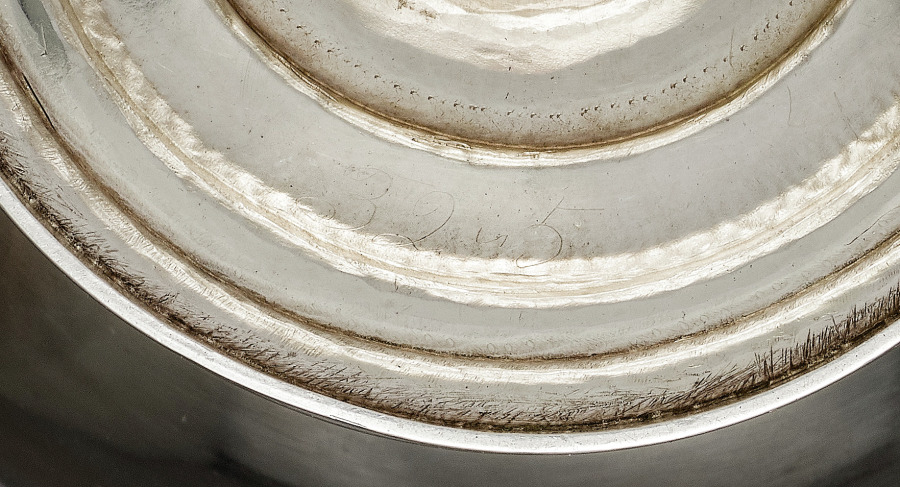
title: Covered Pot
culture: America, Pennsylvania, Philadelphia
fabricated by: after a design by Harvey Lewis (American, 1835)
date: c. 1811–25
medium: silver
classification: Silver